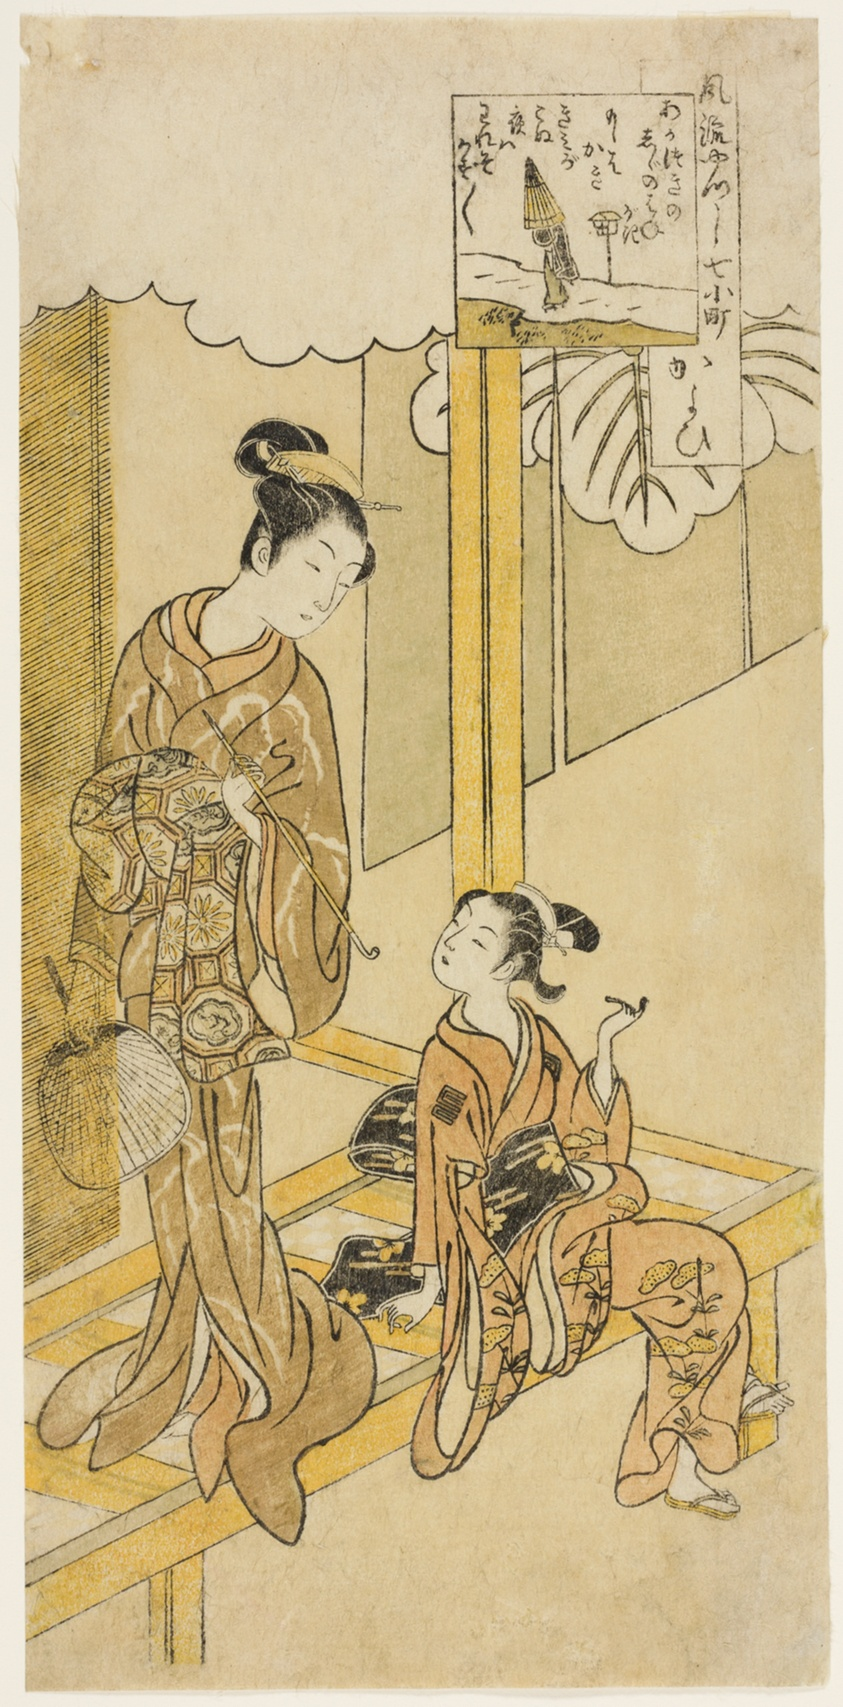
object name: Print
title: Visiting (Kayoi), from the series "The Seven Fashionable Aspects of Komachi (Furyu yatsushi nana Komachi)"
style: Japanese (culture or style)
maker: Suzuki Harunobu 鈴木 春信; Japanese, 1725 (?)-1770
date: c. early 1760s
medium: Color woodblock print; hosoban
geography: Japan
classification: woodblock print; print; asian art